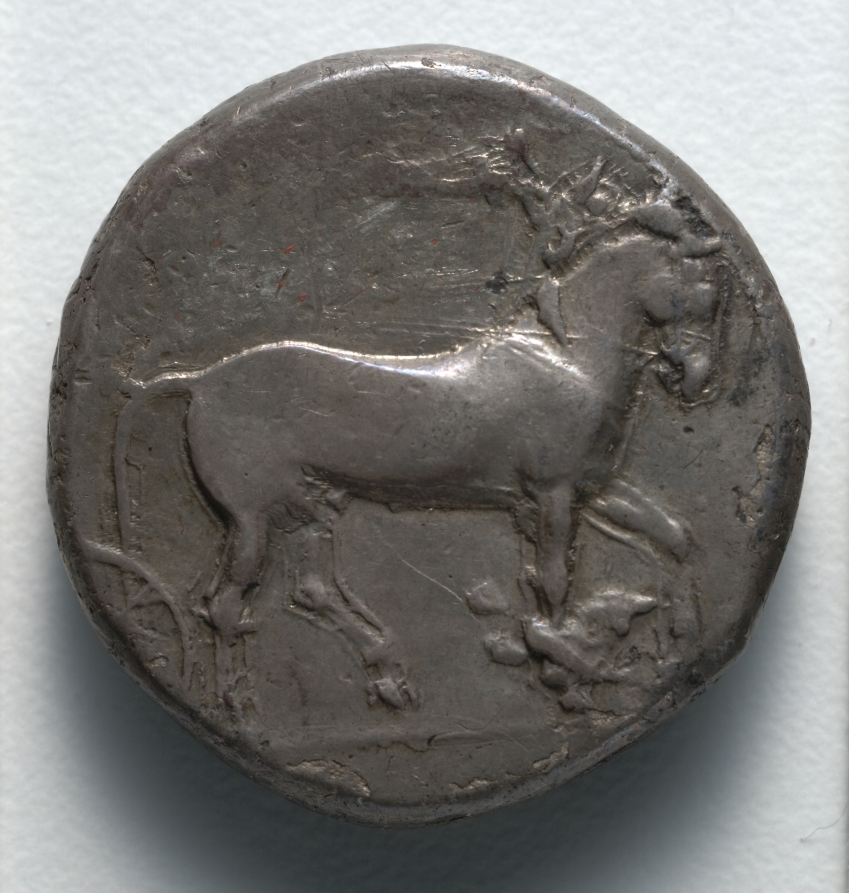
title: Tetradrachm: Quadriga (obverse)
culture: Greek, minted at Syracuse (Sicily)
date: c. 430–420 BCE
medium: silver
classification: Coins